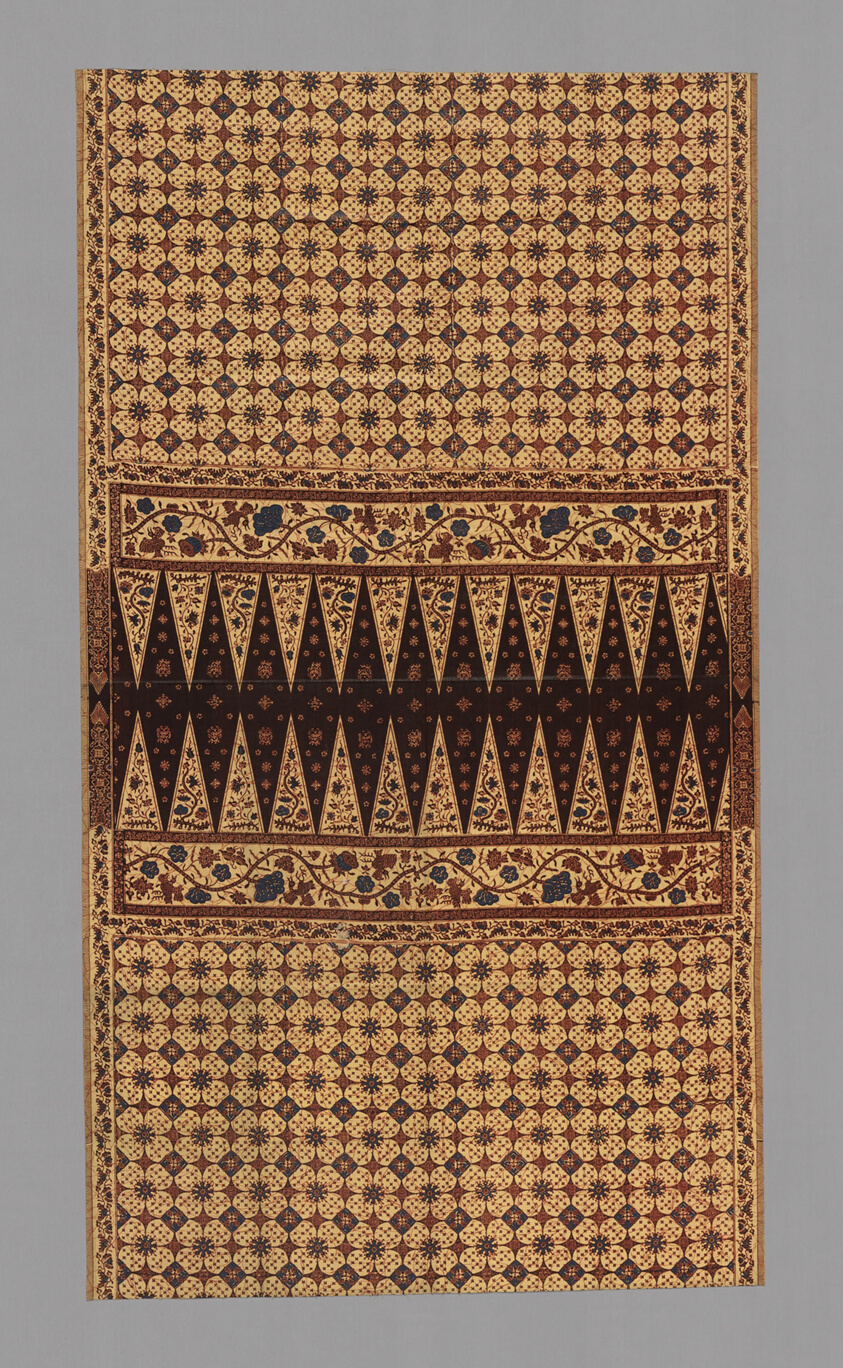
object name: Textile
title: Kain Sarong (Skirt)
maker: Indonesia, Java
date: 1893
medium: Batik dyed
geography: Java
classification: textile; weaving - printed; weaving; costume; dress (garment); clothing